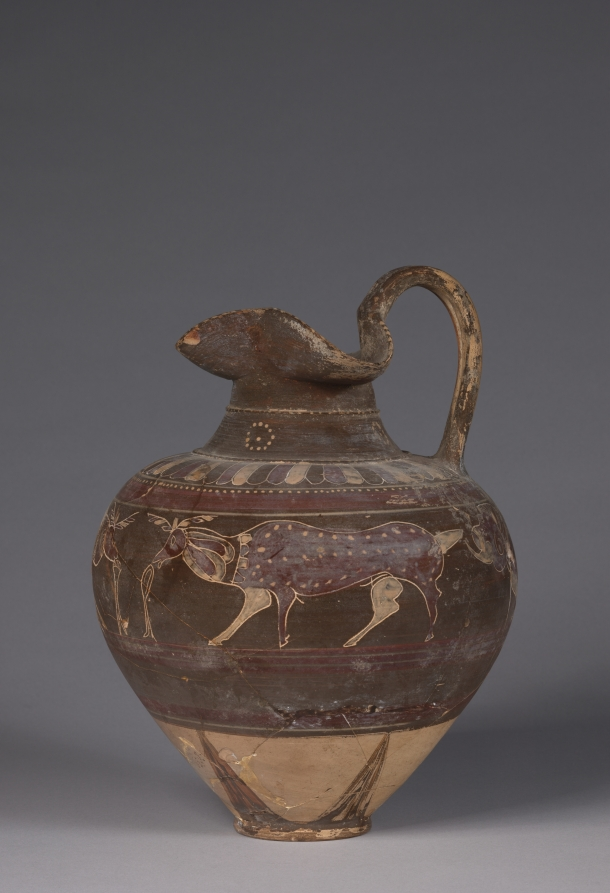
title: Polychrome Oinochoe (Wine Jug): Deer and Lions (?)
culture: Etruscan (Etrusco-Corinthian), probably made at Vulci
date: c. 600–575 BCE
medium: ceramic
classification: Ceramic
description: The animal frieze decorating the widest part of this round-bodied wine jug recalls black-figure pottery imported to Etruria from Greece (especially Corinth). The shape itself, with trefoil mouth and raised handle to facilitate pouring, also resembles Greek models, as do the simple tongues and rays above and below. But the polychromed animals—brightly painted with added white and reddish-purple—identify the vase as Etruscan, likely made at Vulci. The two deer seem to be grazing on stylized plants, unconcerned about the unusual animals pursuing them; these may be lions with horns and long tongues.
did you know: Four animals encircle this jug—two grazing deer and two predators, perhaps lions.